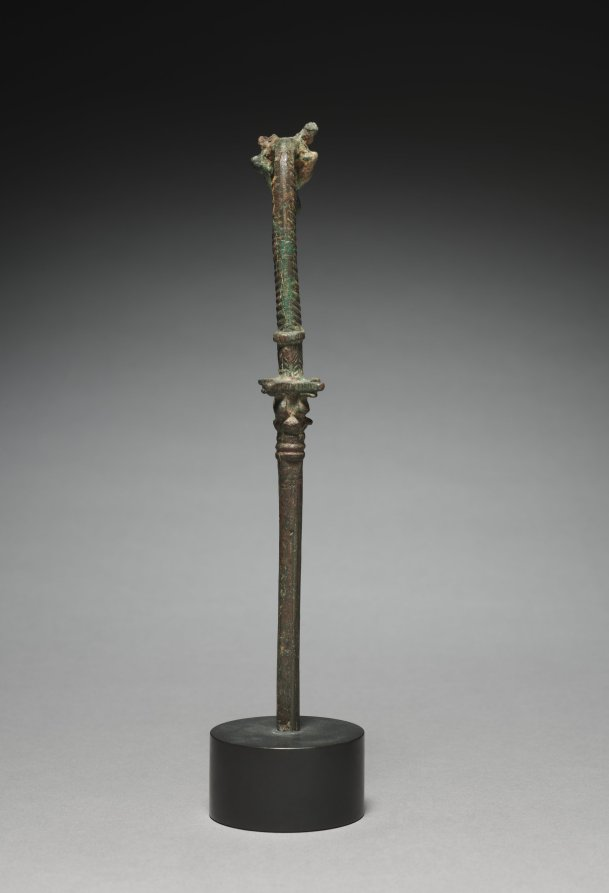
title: Votive Pin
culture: Iran, Luristan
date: early 1000s BCE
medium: bronze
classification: Metalwork